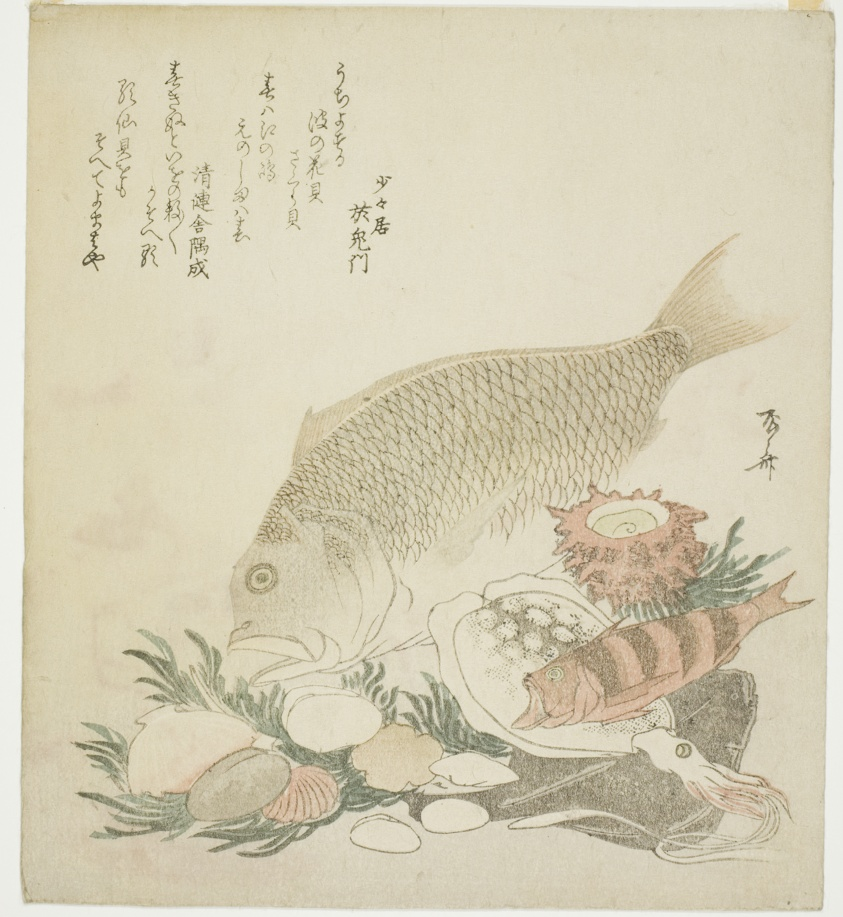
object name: Print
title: Fish and shells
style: Japanese (culture or style)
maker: Ryuryukyo Shinsai (Japanese, c. 1764-1820)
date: 1821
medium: Color woodblock print; shikishiban, surimono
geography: Japan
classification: woodblock print; print; asian art